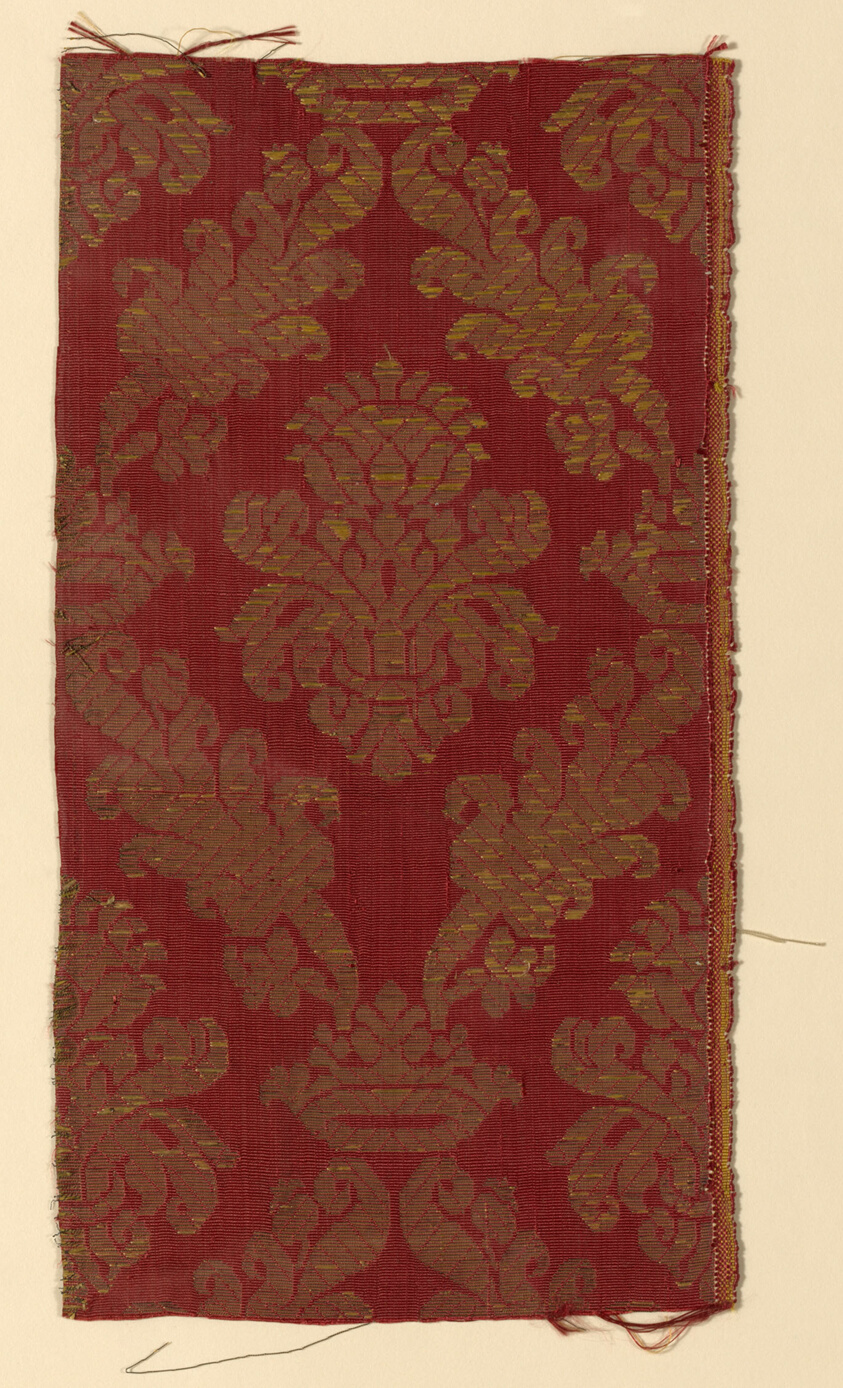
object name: Textile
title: Fragment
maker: Spain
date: 1601/25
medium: Silk and gilt-metal-strip-wrapped silk, warp-faced plain weave with supplementary patterning wefts and supplementary brocading wefts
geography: Spain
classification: textile; weaving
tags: foliage, flowers, crowns